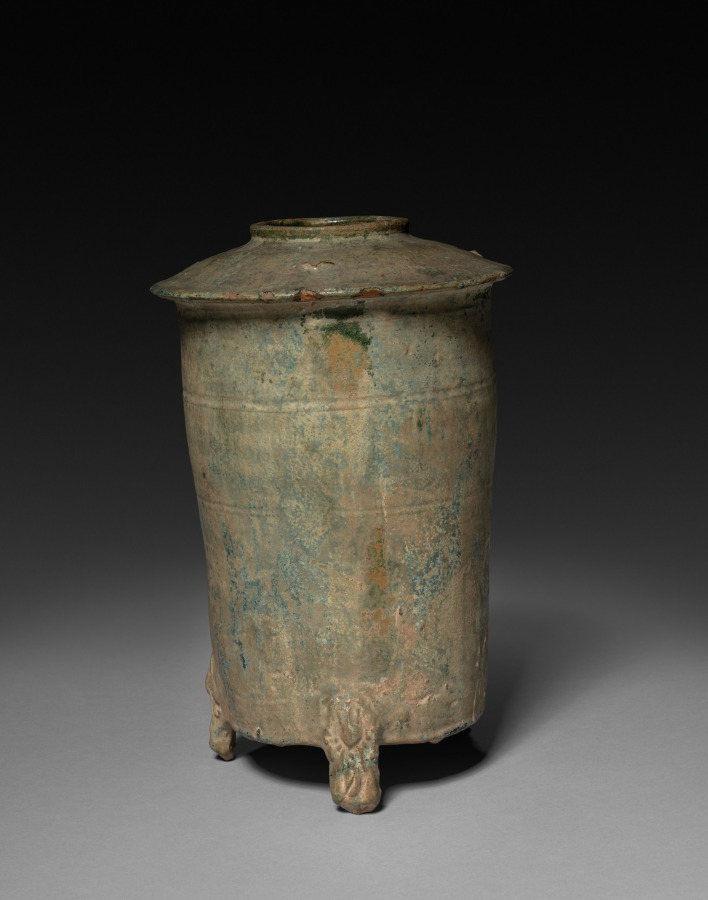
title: Granary Urn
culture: China, Han dynasty (202 BCE–220 CE)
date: 206 BCE–220 CE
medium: glazed earthenware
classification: Ceramic